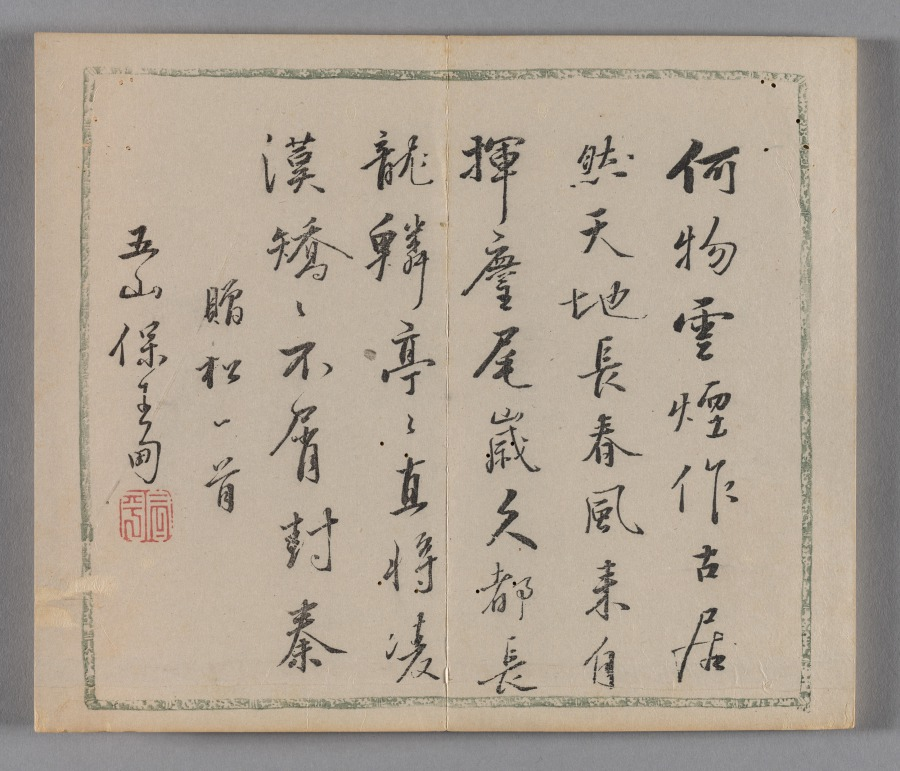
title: Ten Bamboo Studio Painting and Calligraphy Handbook (Shizhuzhai shuhua pu): Round Fans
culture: China, Qing dynasty (1644-1911)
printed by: Hu Zhengyan (Chinese, c. 1584–1674)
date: 1633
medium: Woodblock-printed book; ink and colors on paper; first edition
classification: Print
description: Color printing reached a level of perfection in the early 1600s, as seen in this Ten Bamboo Studio Collection of Calligraphy and Painting and the Mustard Seed Garden Manual of Painting (printed 1679 and 1701). The painterly quality, precision in registering (aligning) the woodblocks, and harmonious colors made them the most successful color print editions in Chinese history. Both editions were printed and compiled in Nanjing, spread nationwide, and had a great impact on the arts in Japan and Korea.